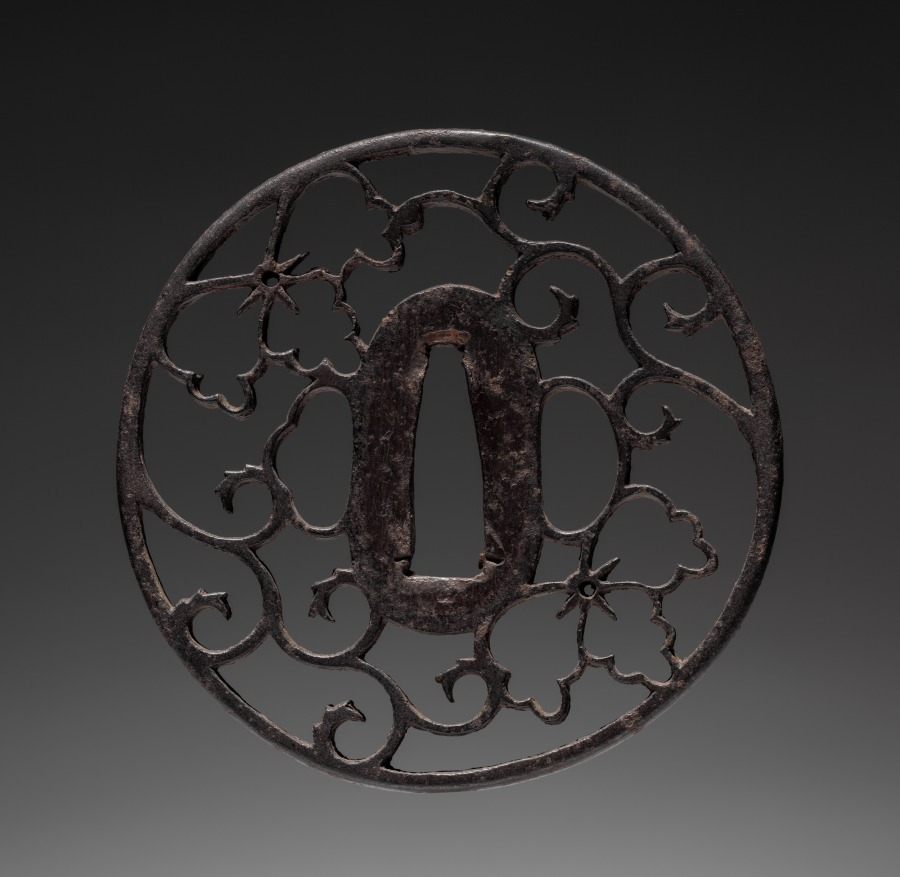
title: Sword Guard (Tsuba)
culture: Japan, Edo period (1615–1868)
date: 1615–1868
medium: iron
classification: Arms and Armor